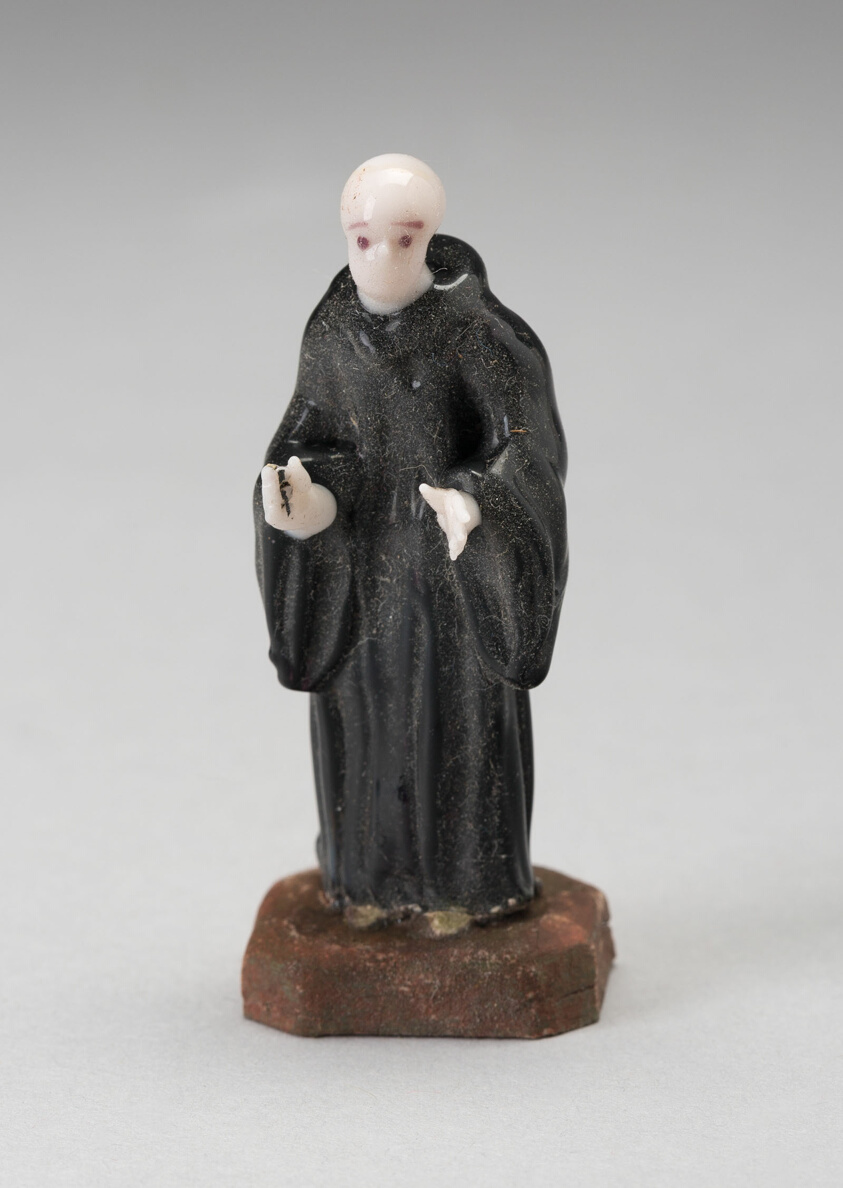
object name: Glass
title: Monk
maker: Nevers, France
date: Late 18th to 19th century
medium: Glass; lampwork (verre de Nevers), metal armature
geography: France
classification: glass; miniature; decorative object/ornament; european decorative arts